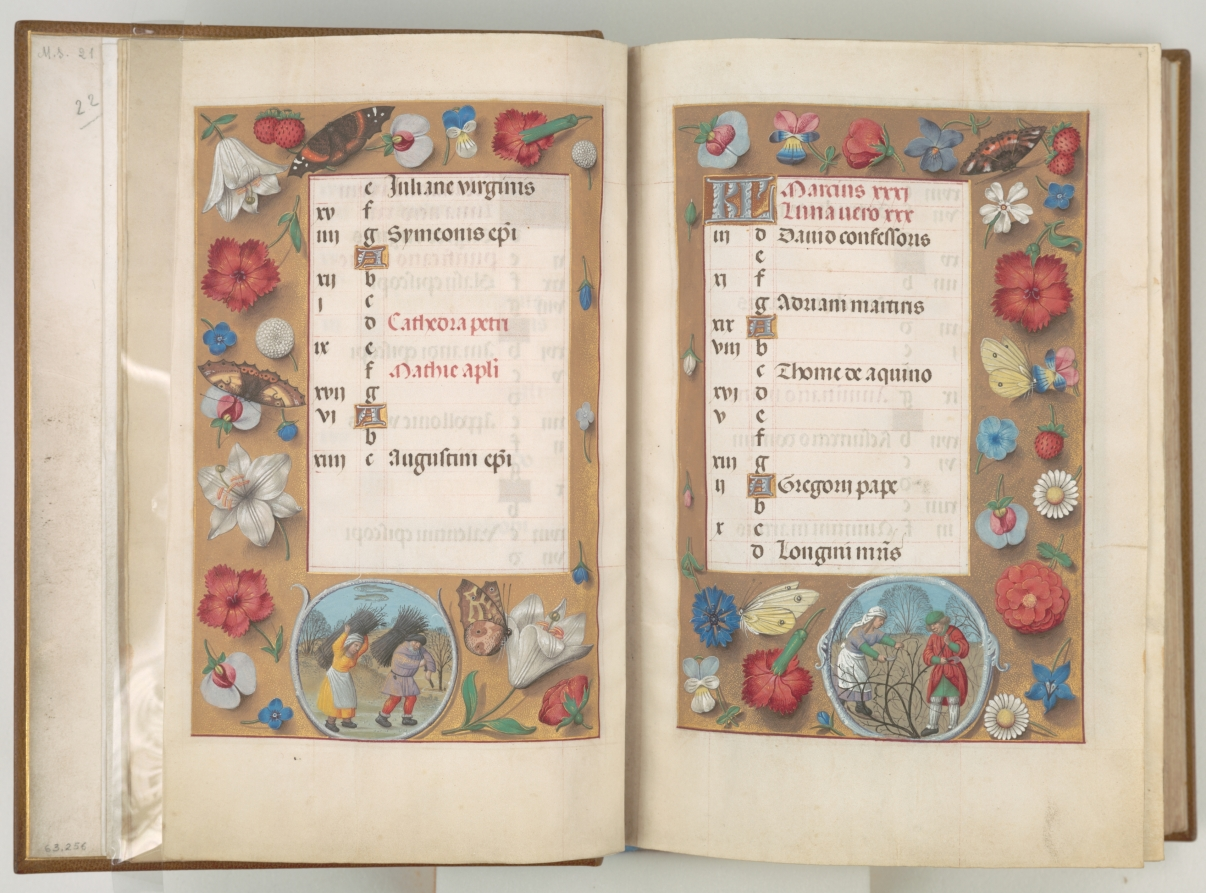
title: Hours of Queen Isabella the Catholic, Queen of Spain: Fol. 3v, February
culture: Flanders, Ghent and Bruges, late 15th century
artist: Master of the First Prayerbook of Maximillian (Flemish, c. 1444–1519)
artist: and Associates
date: c. 1500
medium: ink, tempera, and gold on vellum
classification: Bound Volume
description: This manuscript was illuminated by a circle of at least five highly organized manuscript painters active in the Flemish cities of Ghent and Bruges. The principal illuminator was Alexander Bening, who painted the majority of the book's miniatures. Manuscripts produced by this circle of artists are renowned for the decoration of their borders, which typically feature a rich variety of realistically painted flowers, birds, and butterflies. This prayer book, called a book of hours, was intended not for a cleric but for the private devotions of a lay person—in this case, Isabella the Catholic, Queen of Spain (1451–1504); her coat of arms embellishes the book's frontispiece. It is unlikely that the book was commissioned by the Queen herself; rather, she probably received it as a diplomatic gift from someone courting her patronage, perhaps Cardinal Francisco Jimenez de Cisneros. A Franciscan friar, Jimenez was dependent upon Isabella for his advancement, first to the post of Queen's confessor in 1492, and then to Archbishop of Toledo in 1495.